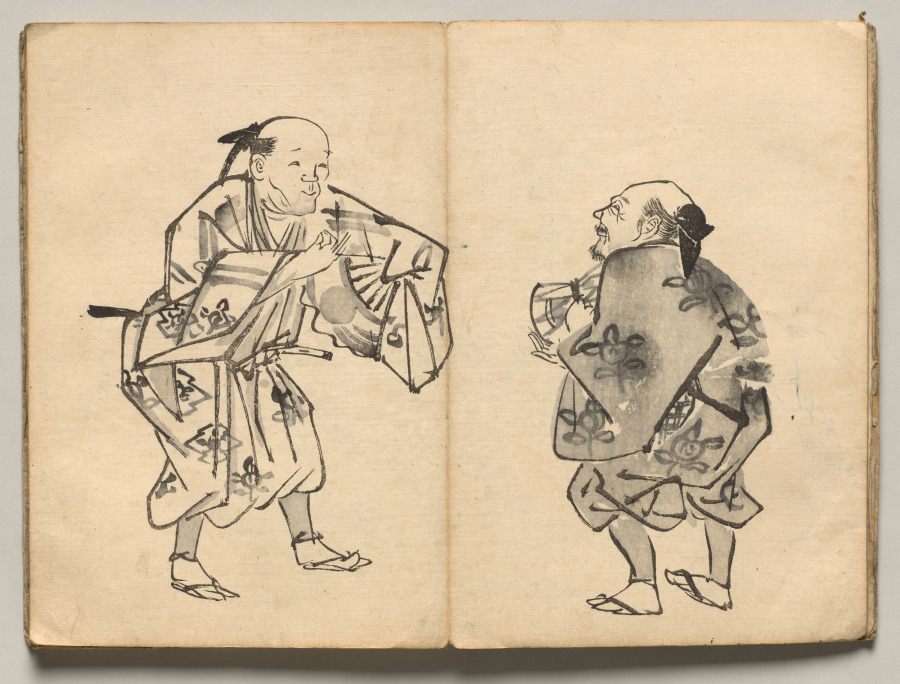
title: Comedic Duo from Ōkyo Picture Book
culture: Japan, Edo period (1615–1868)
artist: after Maruyama Ōkyo (Japanese, 1733–1795)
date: 1850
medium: accordion-style woodblock printed folding-book; ink and color on paper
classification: Bound Volume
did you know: This impression of a book of woodblock-printed designs is missing a spread that depicts a crane.